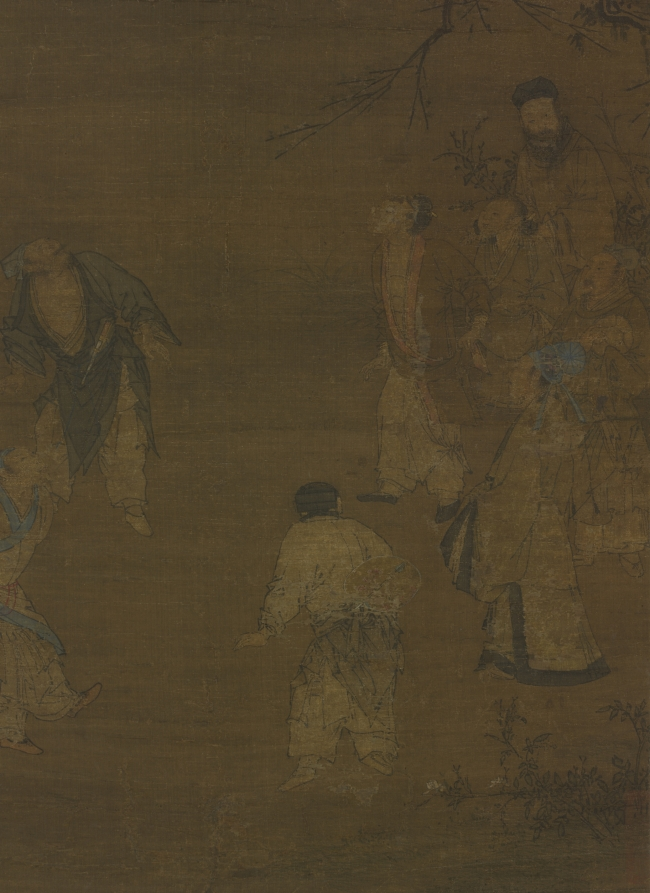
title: The Football Players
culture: China, Southern Song dynasty (1127-1279)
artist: attributed to Ma Yuan (Chinese, c. 1150–after 1255)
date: c. late 1100s–1st quarter 1200s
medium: Hanging scroll; ink and light color on silk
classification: Painting